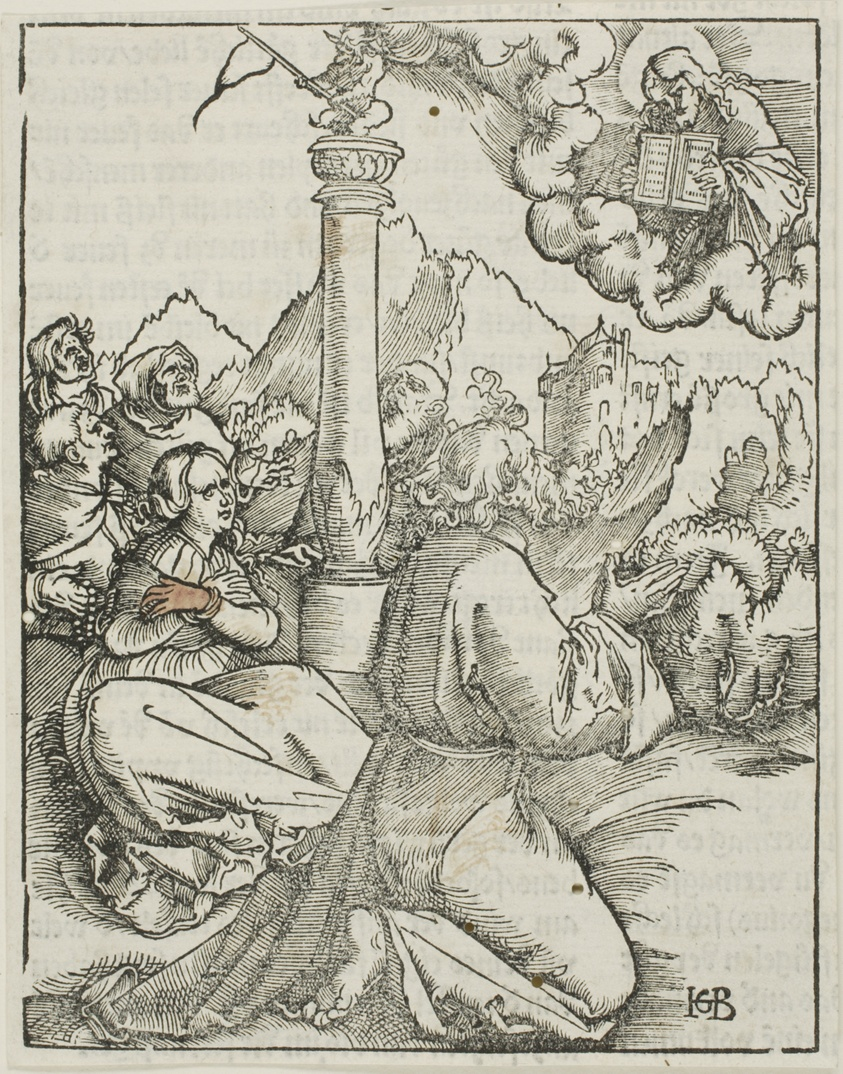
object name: Print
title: Thou Shalt Have No Other Gods before Me, from the Ten Commandments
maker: Hans Baldung Grien (German, 1484/85-1545)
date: 1516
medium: Woodcut in black on ivory laid paper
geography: Germany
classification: woodcut; print; prints and drawing